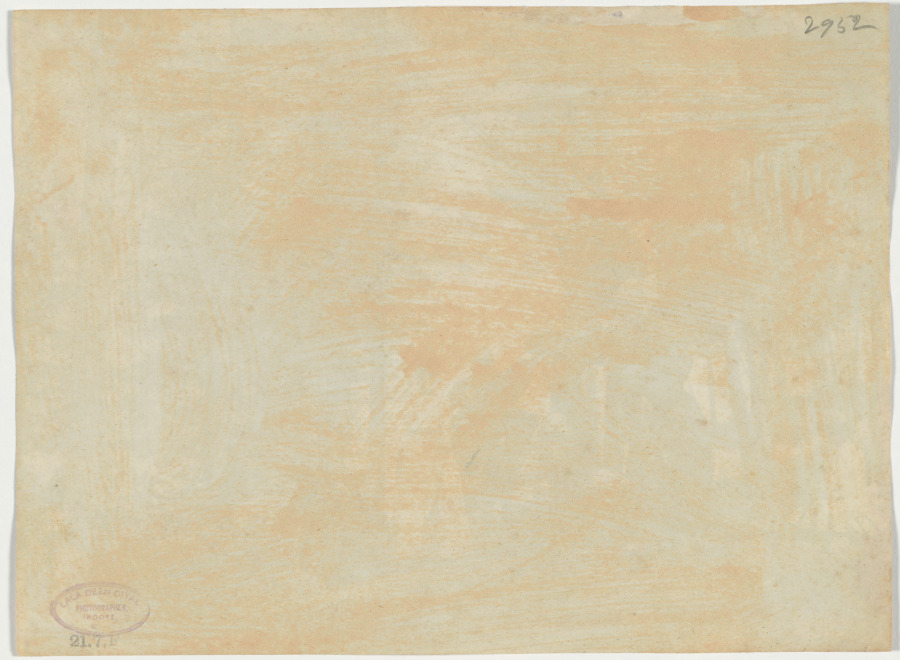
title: Picnic party, Mashobra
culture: India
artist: Raja Deen Dayal (Indian, 1844–1905)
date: 1887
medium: albumen print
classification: Photograph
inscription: Imprinted in white on recto: “2952” Stamped in purple ink on verso: “LALA DEEN DIYAL/PHOTOGRAPHER/INDORE/c.” Stamped in black ink on verso: “21.7.F” Written in pencil on verso: “2952”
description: This scene is from one of many lavish entertainments hosted by caterer, restaurateur, and hotelier Federico Peliti (Italian, 1844–1914) at his forested country estate outside Shimla. In the photograph, Peliti is on horseback and his wife Judith on the swing. Swings have a long history as items of leisurely pleasure in Europe and India. Badminton, which originated in England in 1873, was popular in India. Deen Dayal may have been invited to document this gathering because he and Peliti, an amateur photographer, both belonged to the Photographic Society of Bombay.